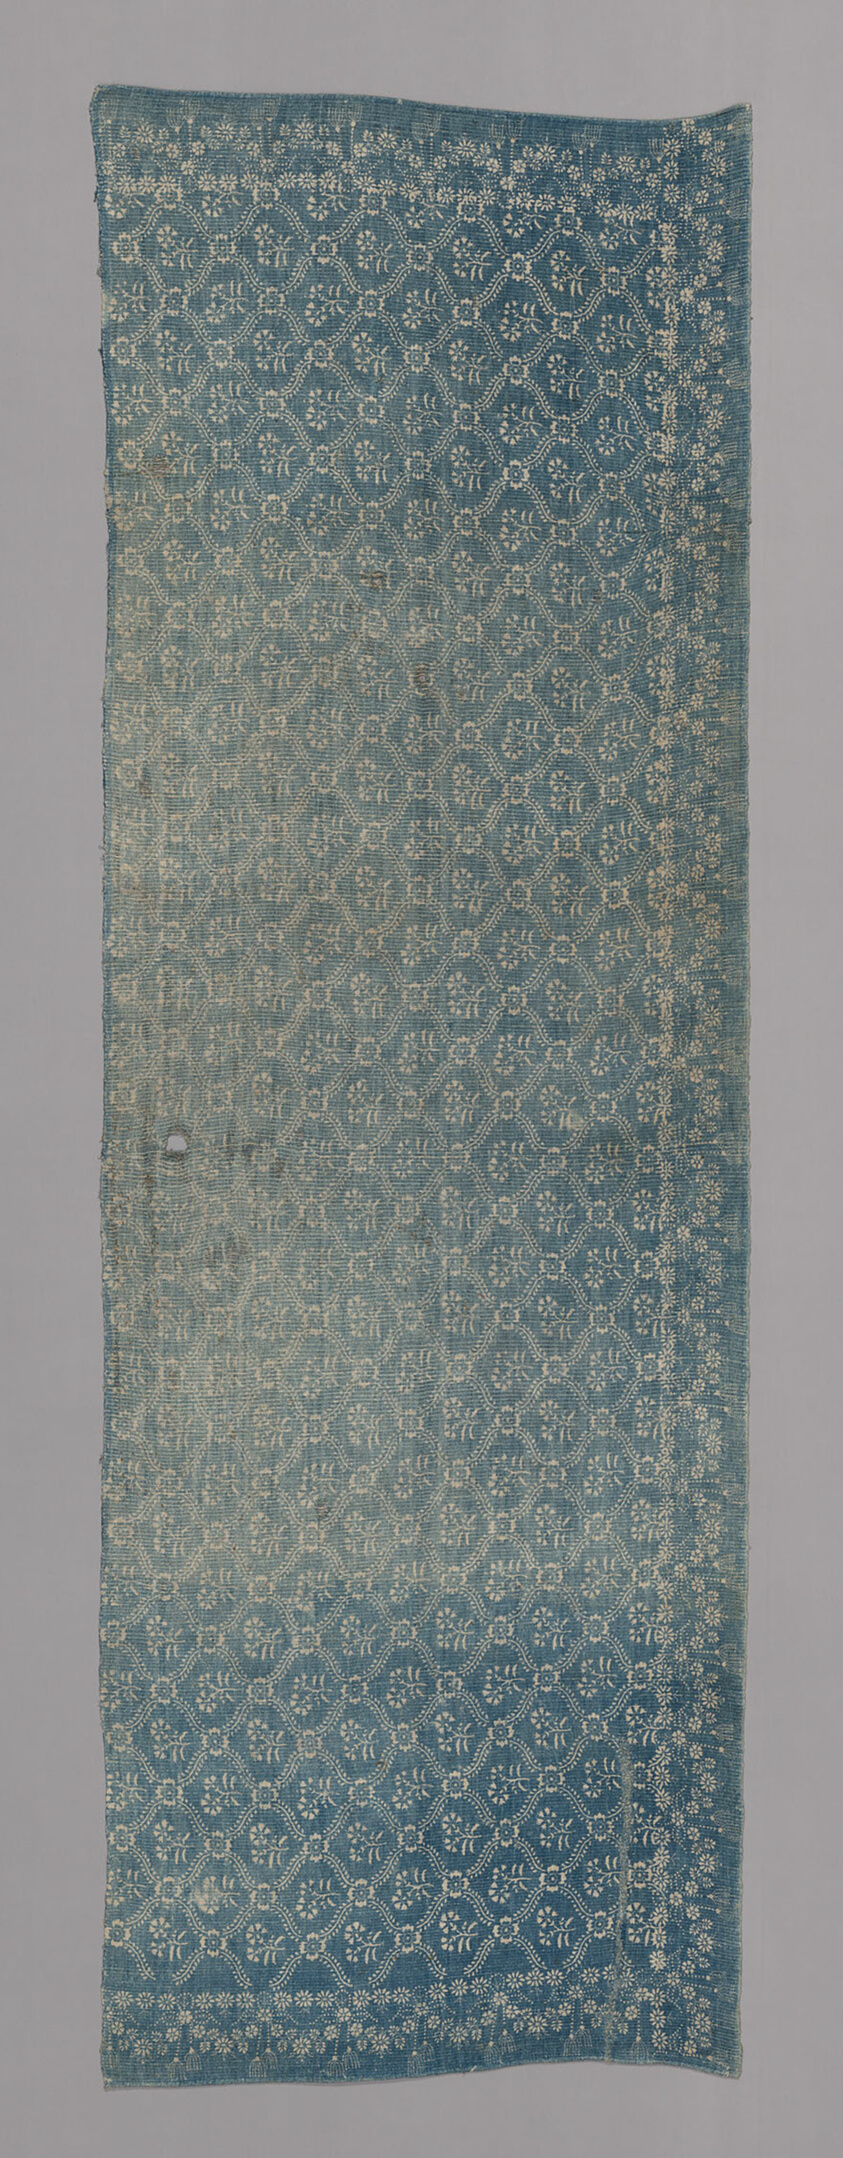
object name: Textile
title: Panels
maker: France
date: 18th century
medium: Cotton, plain weave; resist printed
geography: France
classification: textile; weaving - printed; weaving